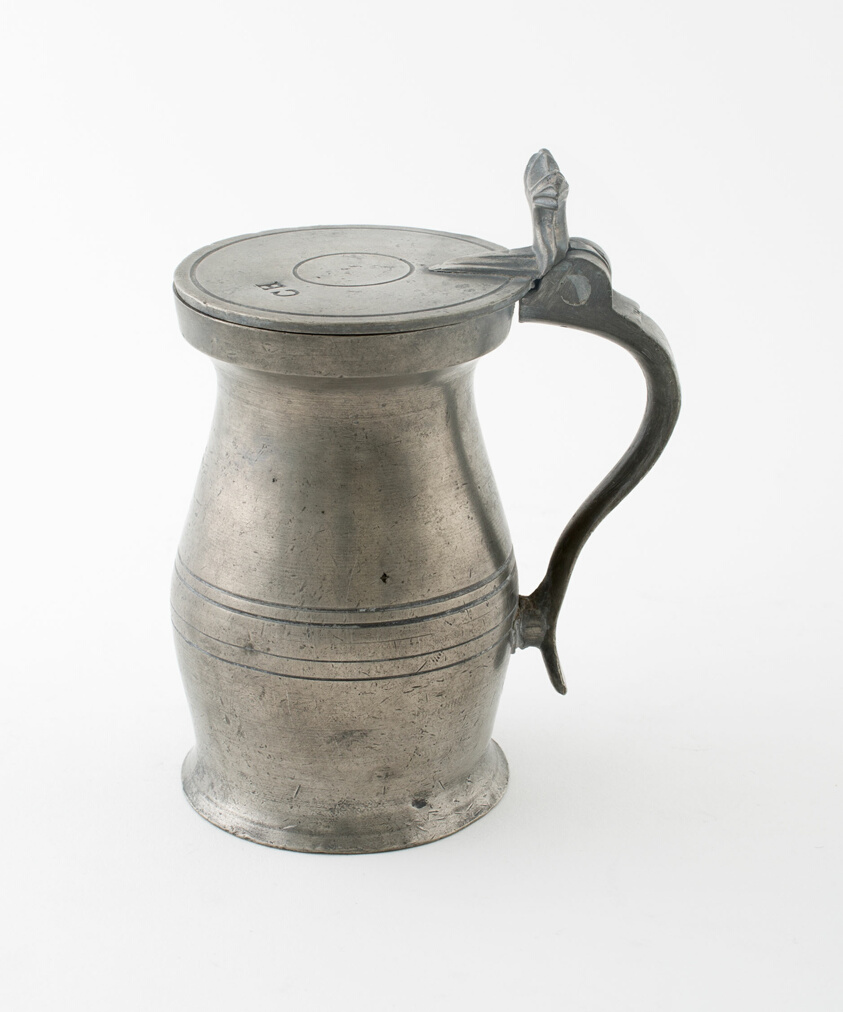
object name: Metalwork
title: Half Pint Covered Wine Measure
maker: England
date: c. 1740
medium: Pewter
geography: England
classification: drinking vessel; pewter; metalwork; european decorative arts